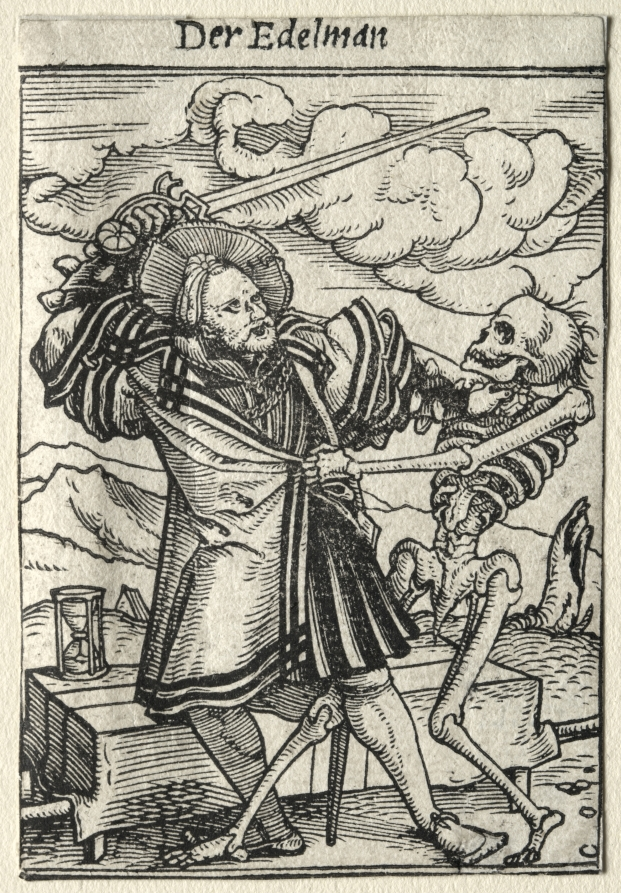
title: Dance of Death: The Nobleman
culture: Germany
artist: Hans Holbein the Younger (German, active England and Switzerland, 1497/98–1543)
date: c. 1526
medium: woodcut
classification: Print